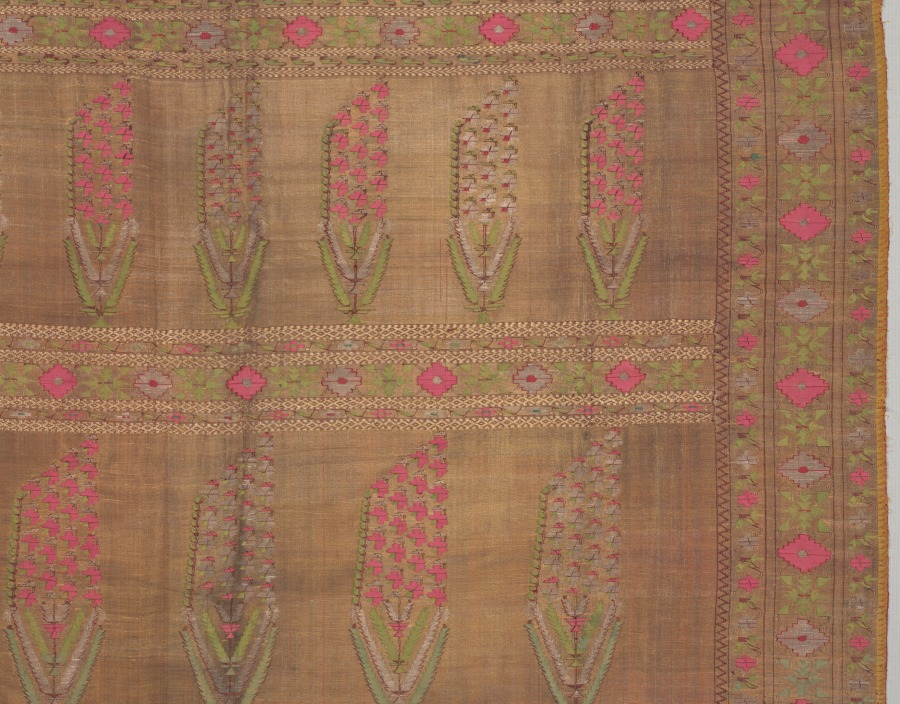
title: Fragment of a Sari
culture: India, Aurangabad ?, 18th-19th century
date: 1700s - 1800s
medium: brocade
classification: Textile